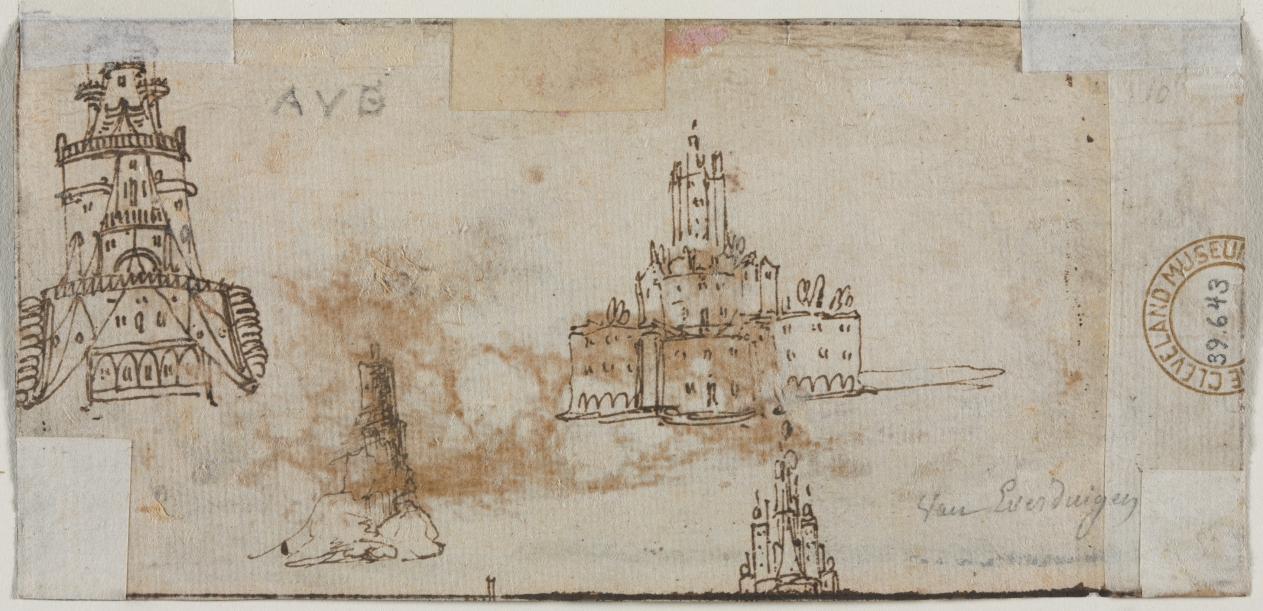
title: Sketches of Castles (verso)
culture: Netherlands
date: 1600s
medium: pen and brown ink, with framing lines in brown ink (iron gall)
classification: Drawing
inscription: upper left, in graphite: AVD ; upper right, in graphite(?): 10 ; lower left, in graphite: Van Everdingen